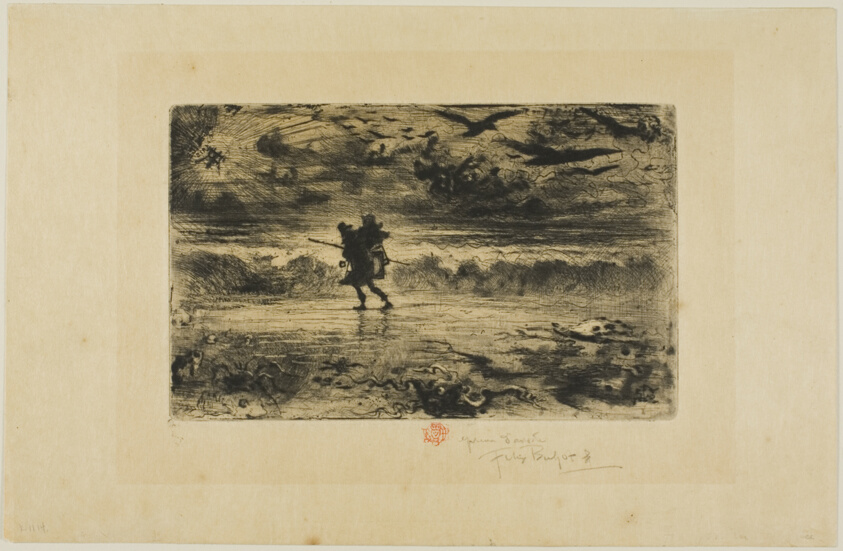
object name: Print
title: The Painter of Seascapes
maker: Félix Hilaire Buhot (French, 1847-1898)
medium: Drypoint on cream Japanese paper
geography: France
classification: drypoint; print; prints and drawing